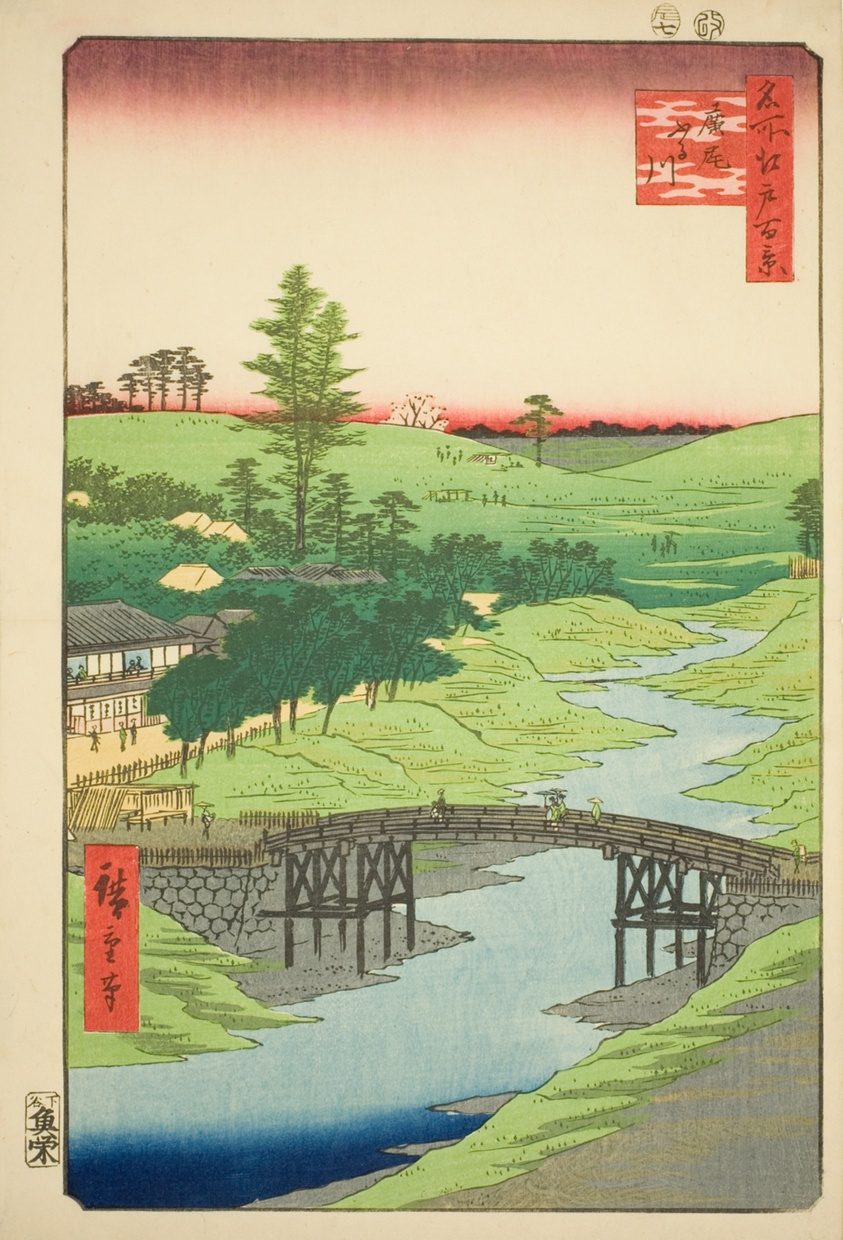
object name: Print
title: Furukawa River, Hiroo (Hiroo Furukawa), No.22 from the series "One Hundred Famous Views of Edo (Meisho Edo hyakkei)"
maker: Utagawa Hiroshige (Japanese, 1797-1858)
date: 1856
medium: Color woodblock print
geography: Japan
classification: woodblock print; print; asian art